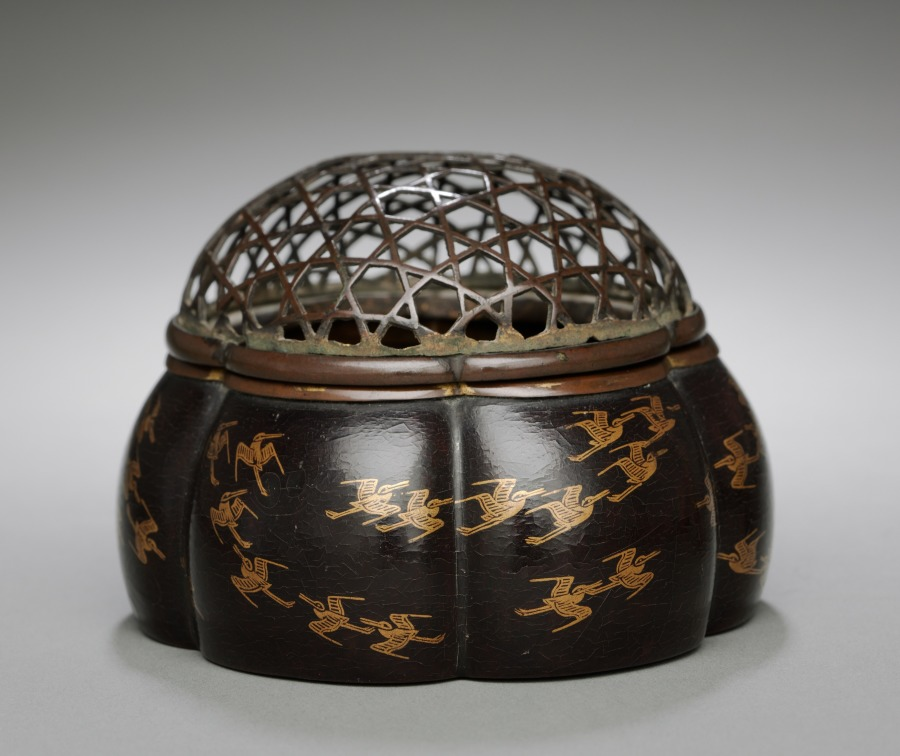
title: Incense Burner with Lid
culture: Japan, Nanbokuchō period (1336–92)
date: late 1300s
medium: black lacquer on wood with decoration in maki-e; metal rims; bronze lid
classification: Lacquer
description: This container's repeated, undulating, rounded sides evoke waves over which the articulated plovers sweep. The bronze cover (probably a later addition) mimics the design of a fishing weir. Overall, the container brings to mind the seashore. The earthy quality of the lacquered surface demonstrates the interaction between a man-made pattern (the plovers) and the somewhat unexpected surface of a natural material such as wood.